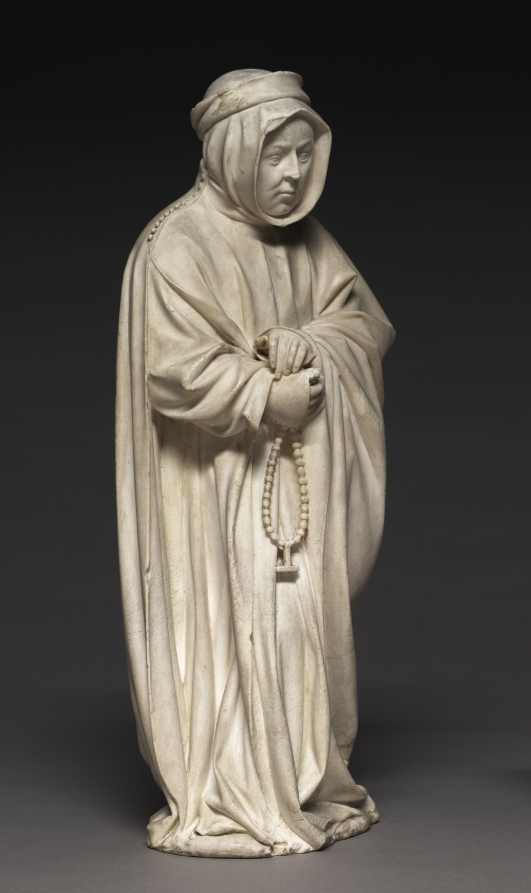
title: Mourner from the Tomb of Philip the Bold, Duke of Burgundy (1364–1404)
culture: Netherlands, active Dijon, 15th century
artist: Claus de Werve (Netherlandish, 1380–1439)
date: 1404–1410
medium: vizille alabaster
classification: Sculpture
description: This figure comes from the tomb of Duke Philip the Bold from the church of Champmol near Dijon (Burgundy, France). Philip, who founded the monastery and designated it as his burial place, hired the best artists, many of whom came from the Netherlands. While the commission was given in 1381, the work was not completed until 1410, six years after the duke’s death. This mourner is unusual for the time because it is not carved as a static low relief on the pedestal of the tomb but interacts with the viewers and their fellow procession members. The lifelike quality of the figure is due in large part to the alabaster. Its softness allowed artists to carve details into the material, and the transparent, milky white stone could also be polished to a high gloss.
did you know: During his life, Duke Philip founded the monastery of Chartreuse de Champmol to serve as a final resting place for himself and his family.